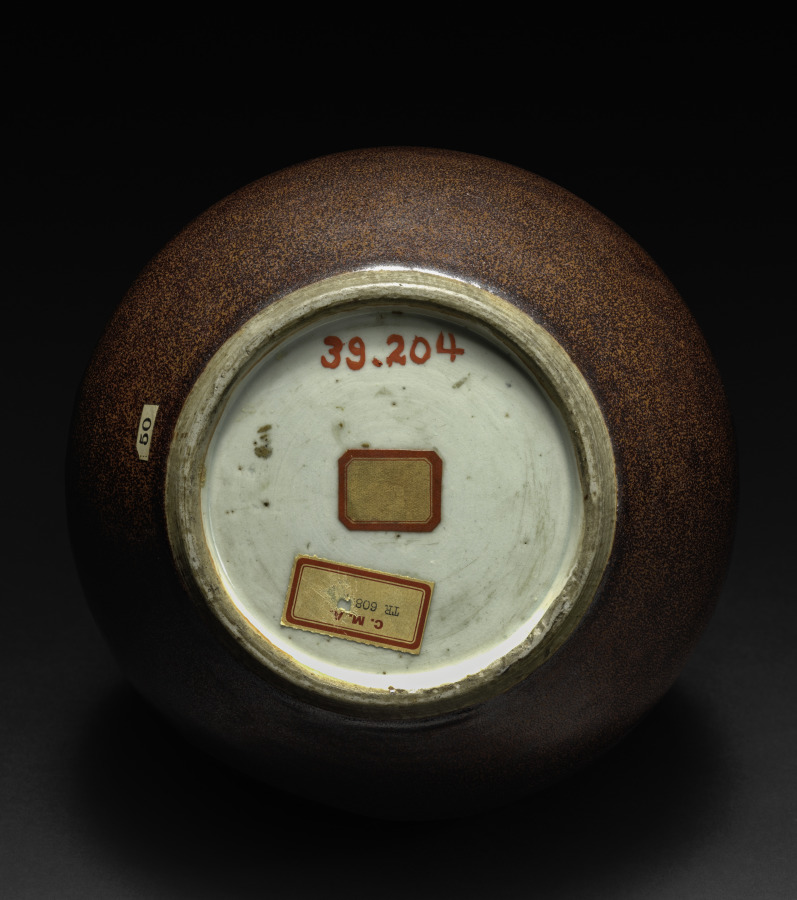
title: Vase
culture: China, Qing dynasty (1644–1911), Qianlong reign (1736–95)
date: 1736–95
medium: porcelain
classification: Ceramic